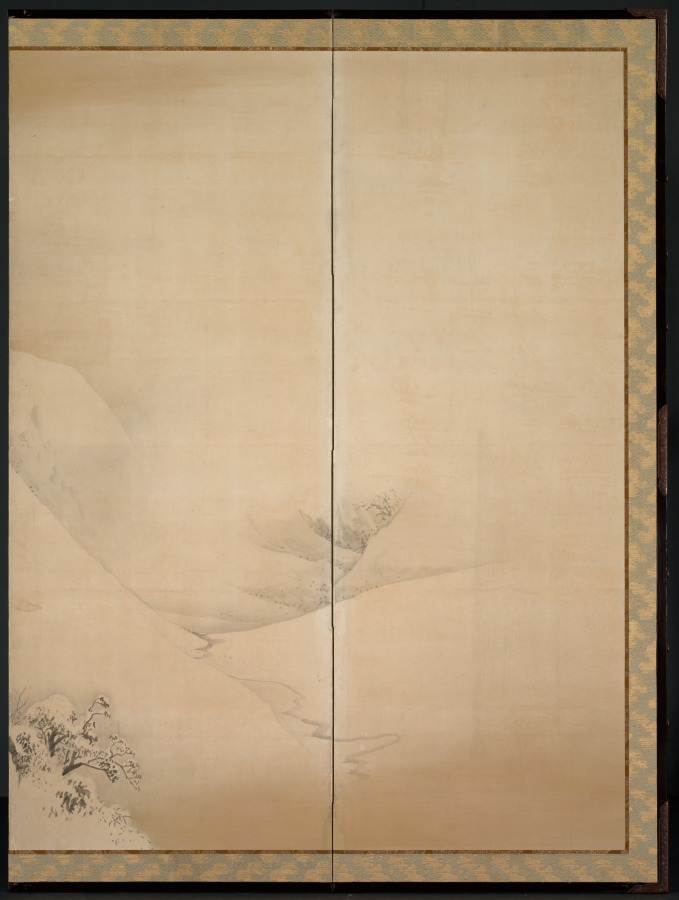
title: Winter Day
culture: Japan, Edo period (1615–1868)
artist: Maruyama Ōkyo (Japanese, 1733–1795)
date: 1784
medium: Six-panel folding screen, ink, gold, and silver on paper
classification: Painting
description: Ōkyo painted these panoramas in the summer of 1784. Regarded as Kyoto's most important painting teacher and accomplished artist, he had studied Western painting techniques, "realistic" sketching from nature, and traditional Japanese style painting (yamato-e). The naturalistic quality of these scenes results from a blend of detailed observation of nature and a remote, even detached regard for man's place in the world.